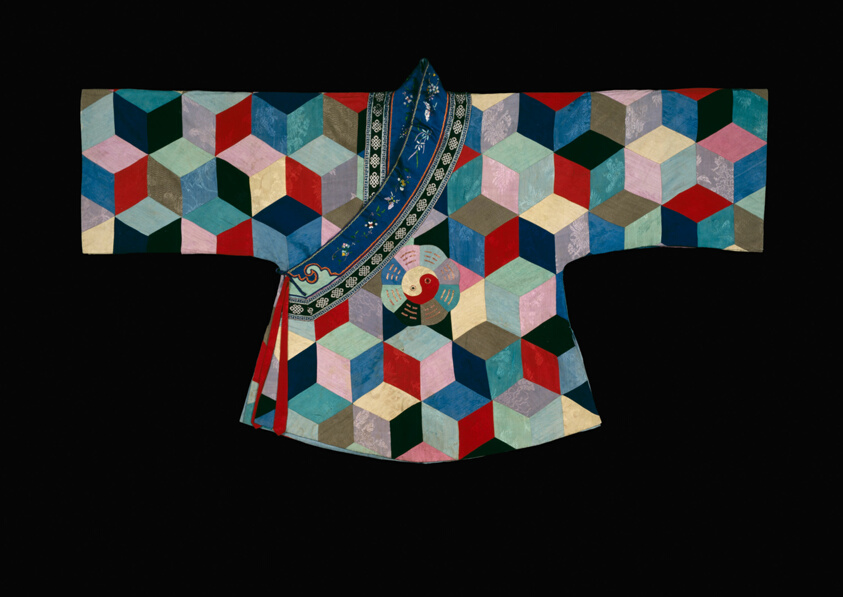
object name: Textile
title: Boy's Baijia Pao ("One Hundred Household" Robe)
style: qing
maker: Han-Chinese (China)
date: Qing dynasty (1644–1911), 1850/1900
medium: Silk, warp-float faced 3:1 'Z' twill weaves self-patterned by areas of plain weave; pieced; medallions with under drawing in black pigment and trimmed with cords of gold-leaf-over-lacquered-paper-strip-wrapped silk couched with silk; neck facing: silk, warp-float faced 7:1 satin weave; embroidered in satin, single satin, and stem stitches; trimmed with braid of silk, 2:2 oblique interlacing and with ribbon of silk and cotton, warp-float faced 7:1 satin weave with supplementary patterning warps and self-patterned by main warp floats; ties: silk, warp-float faced 3:1 'Z' twill weave self-patterned by areas of plain weave; lined with silk, plain weave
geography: China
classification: textile; needlework (visual works); weaving; costume